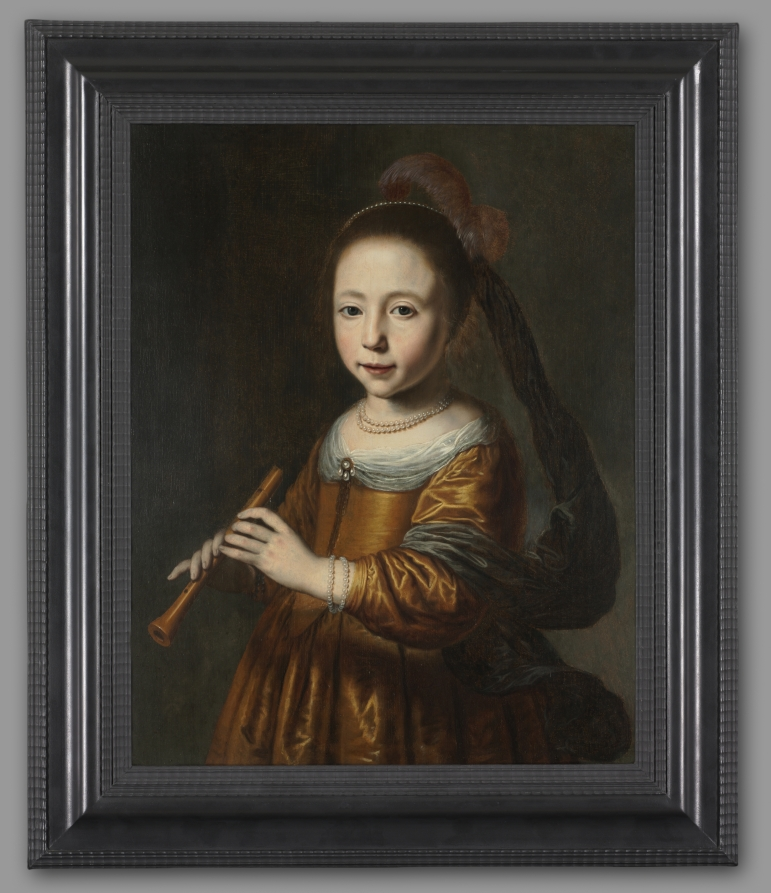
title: Portrait of Elizabeth Spiegel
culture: Netherlands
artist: Dirck Dircksz. Santvoort (Dutch, 1610/11–1680)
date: 1639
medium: oil on wood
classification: Painting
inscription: Inscribed on back: "Elisabet Spiegel"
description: This painting belongs to a series of portraits representing the five senses and each depicting a daughter of a wealthy family from Amsterdam. This portrait of 11-year-old Elizabeth Spiegel, who holds a recorder in her hands, represents the sense of hearing. Her gown of costly satin and pearl ornaments proclaims her family's prosperity, and the imported ostrich feathers from Africa indicate Amsterdam's role as an international trade center.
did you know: Amsterdam was a very important trade center when this portrait was painted in the mid-1600s. In this portrait, the girl wears an African ostrich feather in her hair and her skin appears to glow. Look closely at the way her small hands were treated and the naturalistic way they grip the musical instrument.